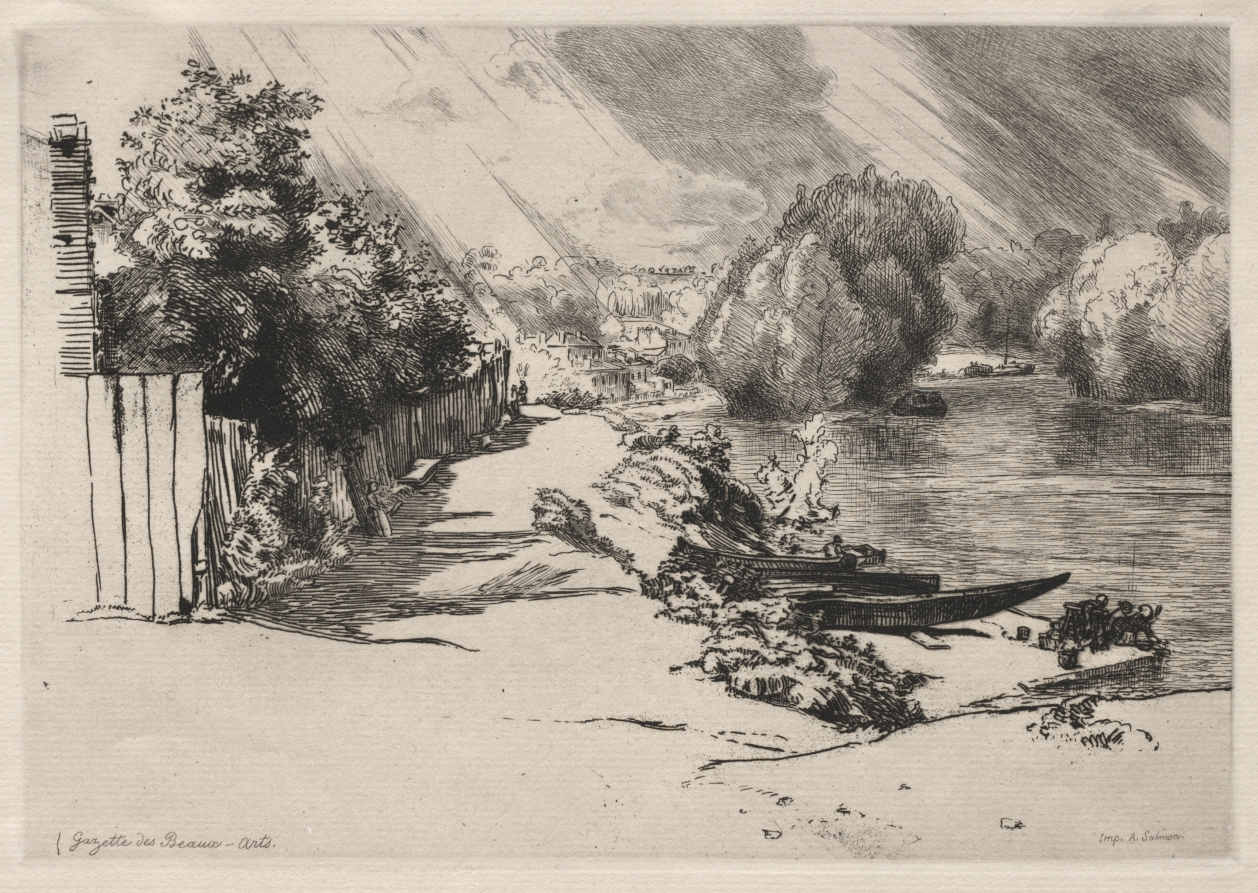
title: The Seine at Bas-Meudon with the Seguin and Mottiaux Islands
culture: France, 19th century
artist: Félix Bracquemond (French, 1833–1914)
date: 1868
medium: etching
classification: Print